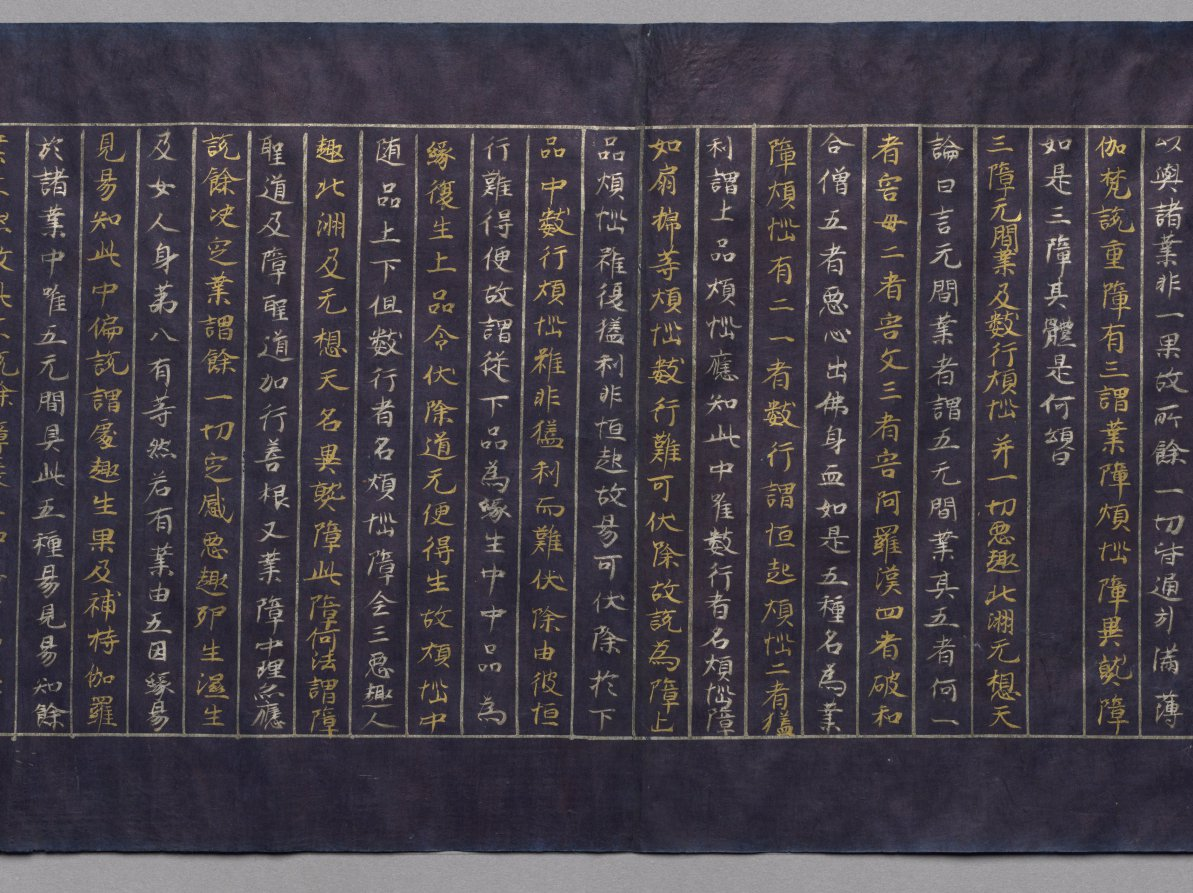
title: Meta-Discourse on the Teachings from the Treasury (Abidharmakosha-Bhashya)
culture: Japan, Heian period (794–1185)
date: 1100s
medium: handscroll; gold and silver on indigo-dyed paper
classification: Manuscript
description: This religious text relates some of the teachings of the great fourth-century Indian Buddhist scholar Vasubhandhu. The text analyzes human consciousness in its relationship to the environment and transformations that occur during meditation. This scroll is the 17th part of a 30-part translation of the text by Xuanzang, an eminent seventh-century Chinese monk.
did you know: The frontispiece depicts the Buddha Shakyamuni preaching in a paradisical landscape.